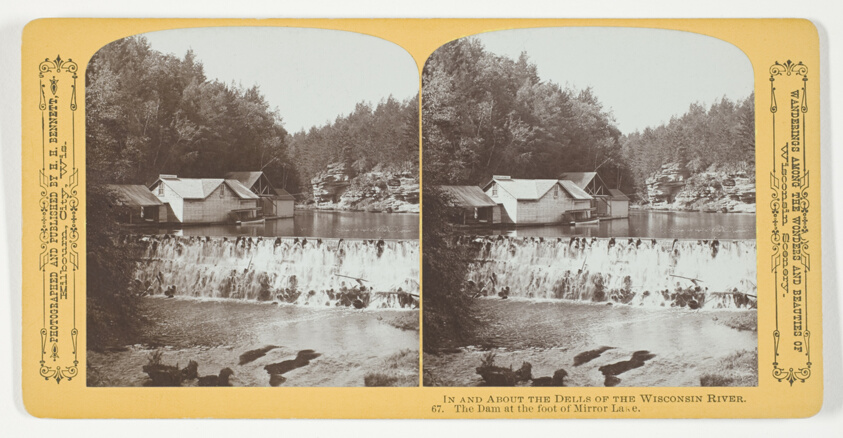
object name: Photograph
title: The Dam at the foot of Mirror Lake, No. 67 from the series "In and About the Dells of the Wisconsin River"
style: 19th century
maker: Henry Hamilton Bennett (American, born Canada, 1843-1908)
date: 1870/1908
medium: Albumen print, stereo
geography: Wisconsin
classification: photography; photograph; albumen silver print; stereograph (albumen)